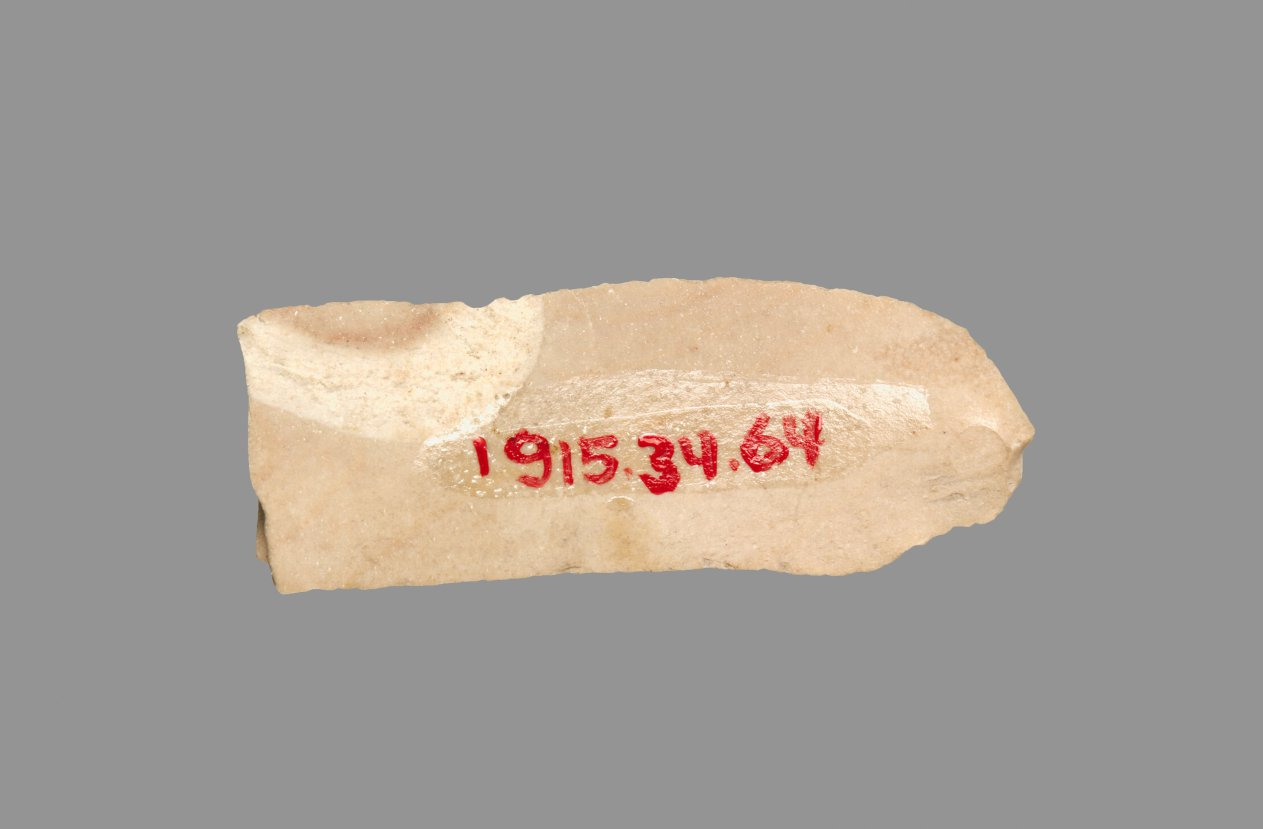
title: Sickle Blade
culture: Egypt, Middle Kingdom (2040–1648 BCE), Dynasty 12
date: 1980–1801 BCE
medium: flint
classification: Implements